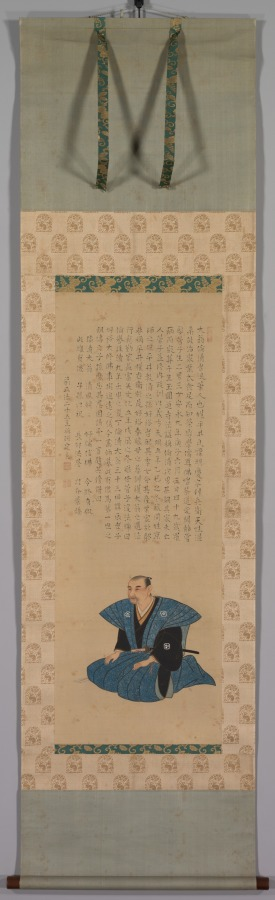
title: Portrait of Samurai-Official: Hirai Rinsei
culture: Japan, Edo period (1615–1868)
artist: attributed to Tsukioka Settei (Japanese, 1710–1786)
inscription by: Jogen (Japanese)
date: 1776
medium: hanging scroll; ink and color on silk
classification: Painting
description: In this pair of figure paintings, the artist provided generational portraits of two clan leaders from the Hirai family, accompanied by lengthy inscriptions in a distinctive calligraphic style from separate scholar-officials.